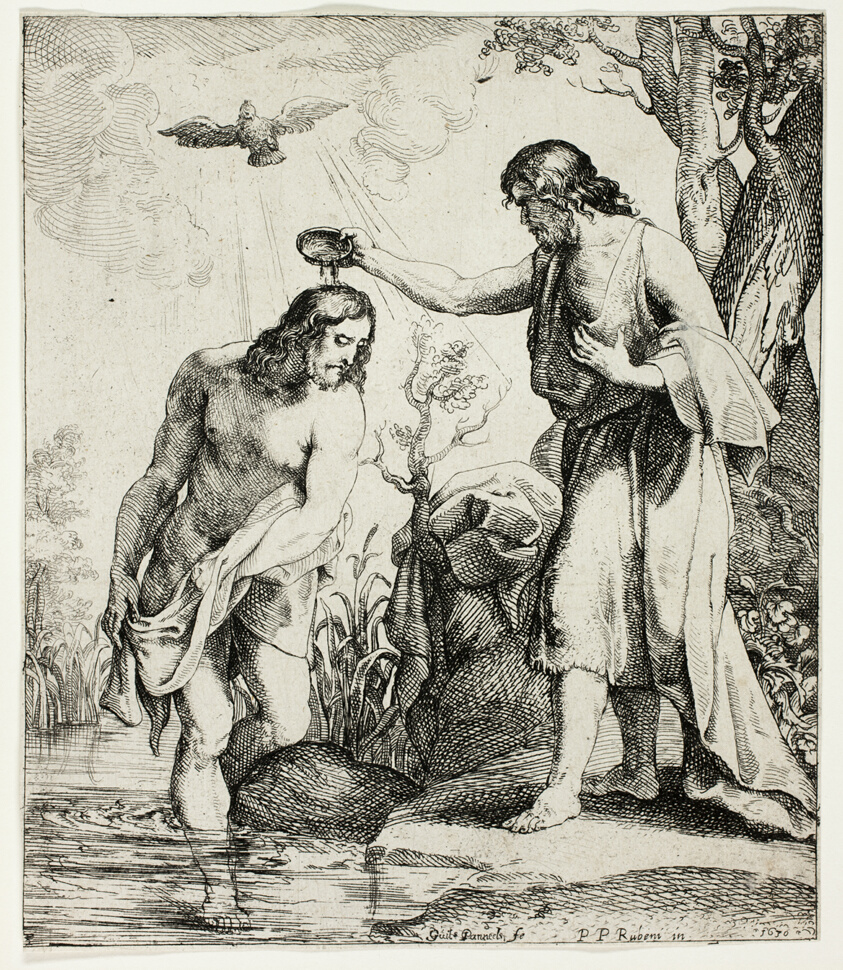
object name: Print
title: The Baptism of Christ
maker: Willem Panneels (Flemish, c. 1600–c. 1632); after Peter Paul Rubens (Flemish, 1577–1640)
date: 1630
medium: Etching on ivory laid paper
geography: Flanders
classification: etching; paper; print; prints and drawing